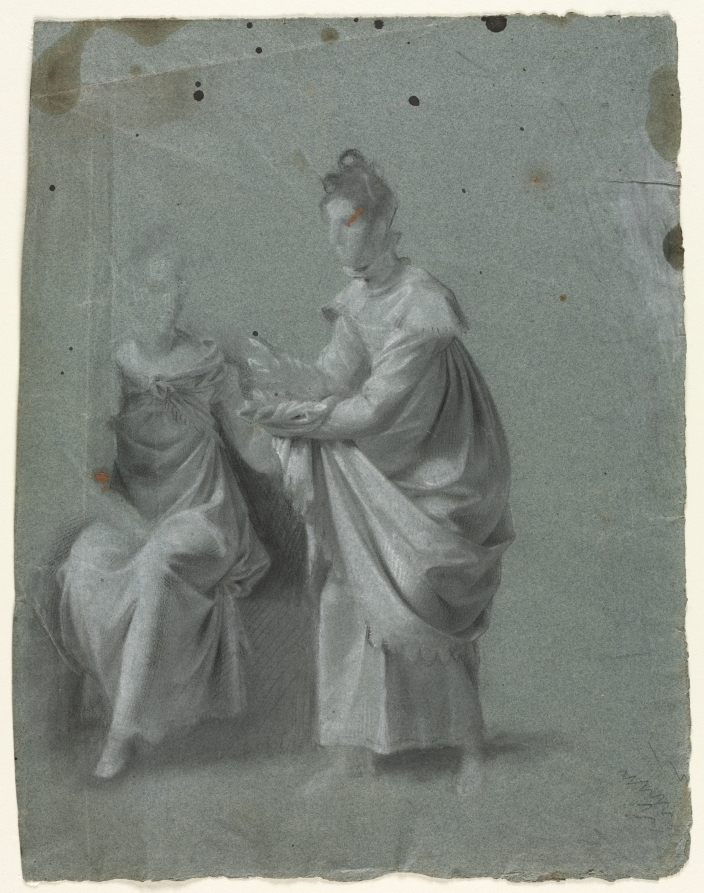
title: Two Women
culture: France, 19th century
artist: Anonymous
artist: circle of Pierre-Paul Prud'hon (French, 1758–1823)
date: 1800s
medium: black chalk heightened with white chalk, both with stumping (with spots of black ink and brown paint, unrelated to composition)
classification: Drawing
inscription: VERSO, across bottom, in graphite: P.P. Prud'hon [illegible] / par [illegible]